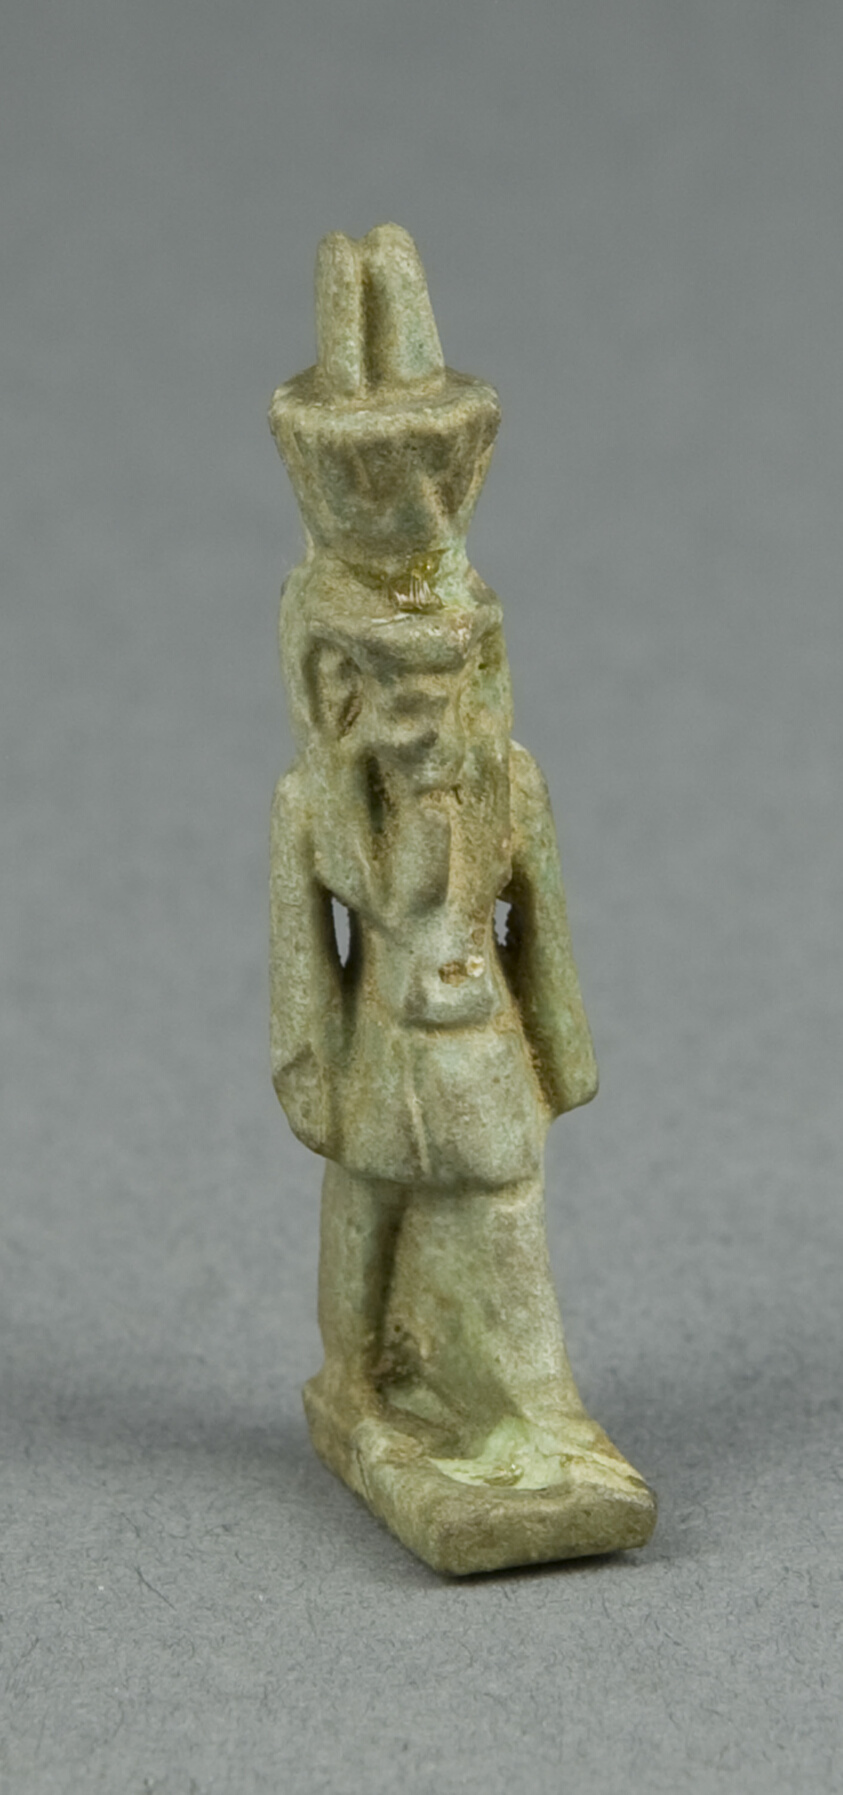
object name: Costume and Accessories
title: Amulet of the God Nefertem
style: egyptian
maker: Egyptian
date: Third Intermediate Period–Late Period (about 1070–332 BCE)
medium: Faience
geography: Egypt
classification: amulet; jewelry; ceramics; ancient art; costume; faïence (composite material)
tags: gods (deities)